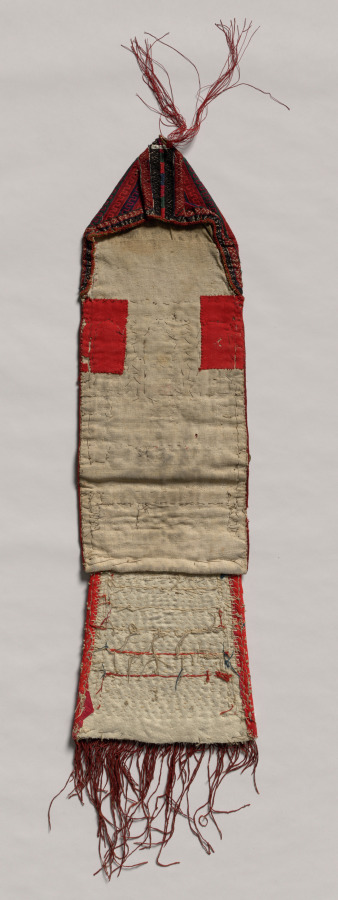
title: Headdress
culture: probably southeastern Europe, Balkans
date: 1800s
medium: Linen, shells, glass beads, metal coins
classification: Garment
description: This long, colorful headdress would hang over the head and down a woman's back. It consists of several panels of linen sewn together, and densely embroidered with silk thread. On the middle panel, small black, red, white, yellow, and red beads are stitched to create geometric designs. Double rows of small cowrie shells outline them, and metal coins with a crescent moon motif also feature in the decoration. These are first punctured, then stitched onto the textile. The lowermost edge is finished with a red fringe.